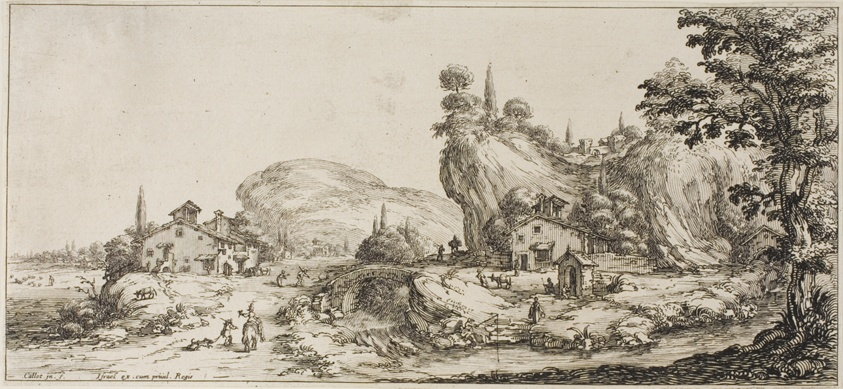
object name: Print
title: Returning from the Hunt, from Various Scenes Designed in Florence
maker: Jacques Callot (French, 1592-1635)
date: 1618–20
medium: Etching on paper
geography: France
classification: etching; print; prints and drawing